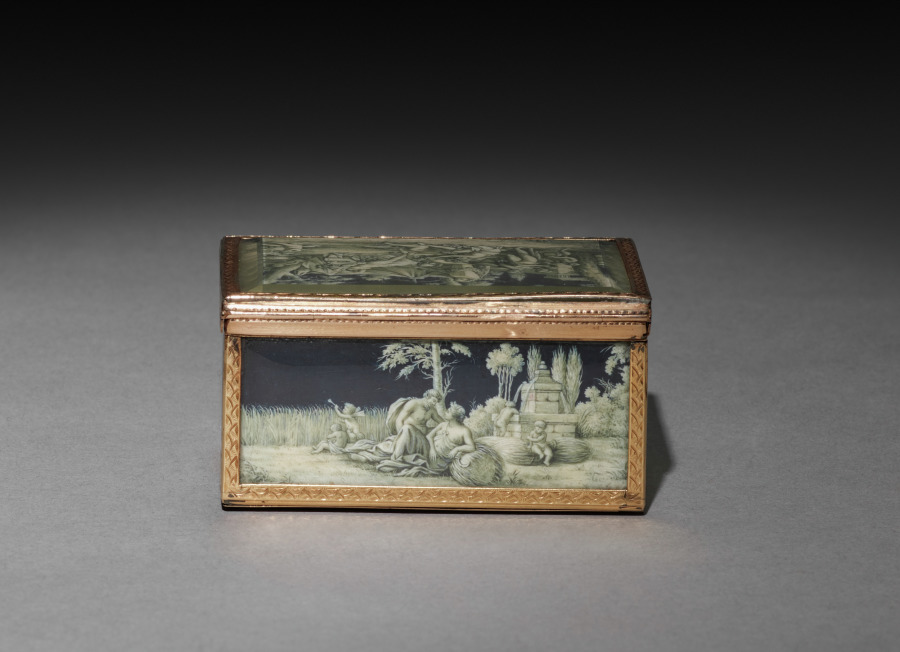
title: Box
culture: France, 19th century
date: 1800s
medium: painted miniatures under glass mounted in gold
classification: Miscellaneous